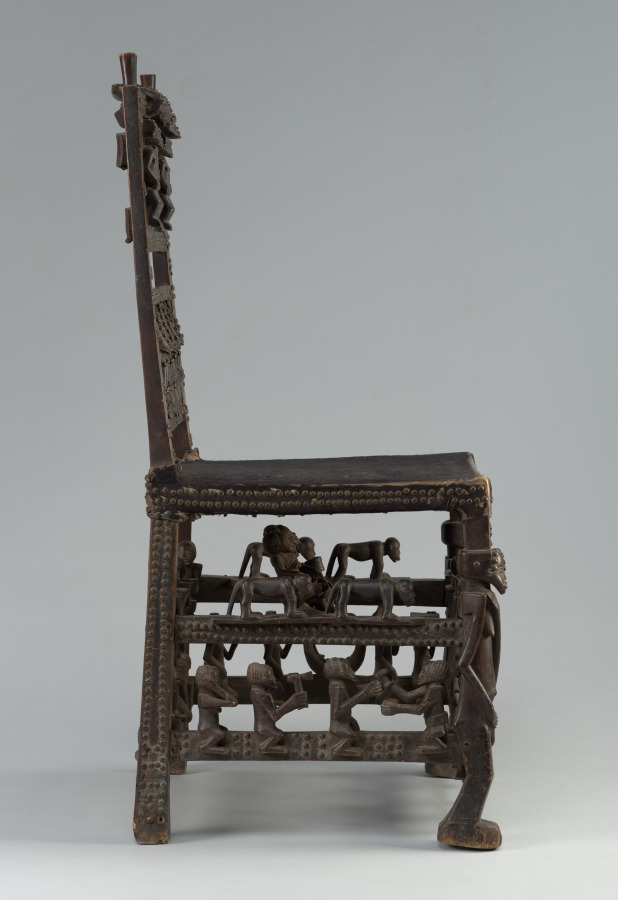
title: Ceremonial Chair or Throne (citwamo ca mangu)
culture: Africa, Central Africa, Angola, Chokwe-style carver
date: 1800s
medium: Wood, upholstery studs, leather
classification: Furniture and woodwork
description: This citwamo ca mangu chair bears over 40 sculpted figures arranged in complex compositions across the chair’s top rail (back), stretchers (rungs), and legs; all symbolize the power of Chokwe supreme chiefs. Such chairs typically bear a dozen or fewer figures. Scenes of royal life and power wrap around the seat, reinforcing how the chief and his family are at the center of their polity and its business.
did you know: Starting around the 1500s, Chokwe and other African leaders and traders received fine chairs as gifts from Portuguese traders. Chokwe leaders adapted this symbol of power as their own, using it in tandem with stools, an earlier kind of prestige seat.